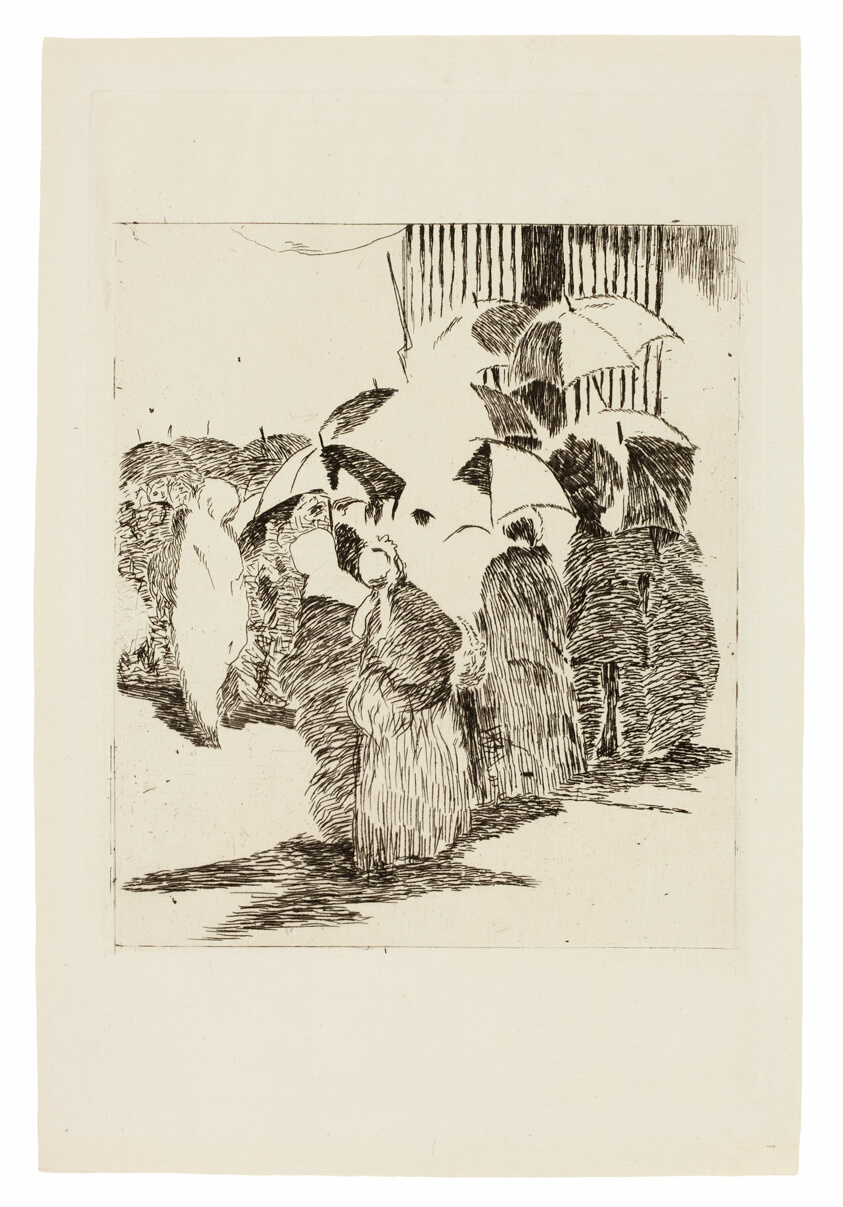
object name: Print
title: Line in Front of the Butcher Shop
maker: Édouard Manet (French, 1832-1883); printed by Henri Charles Guérard (French, 1846-1897)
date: 1870–71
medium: Etching in warm black on ivory laid paper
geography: France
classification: etching; print; prints and drawing